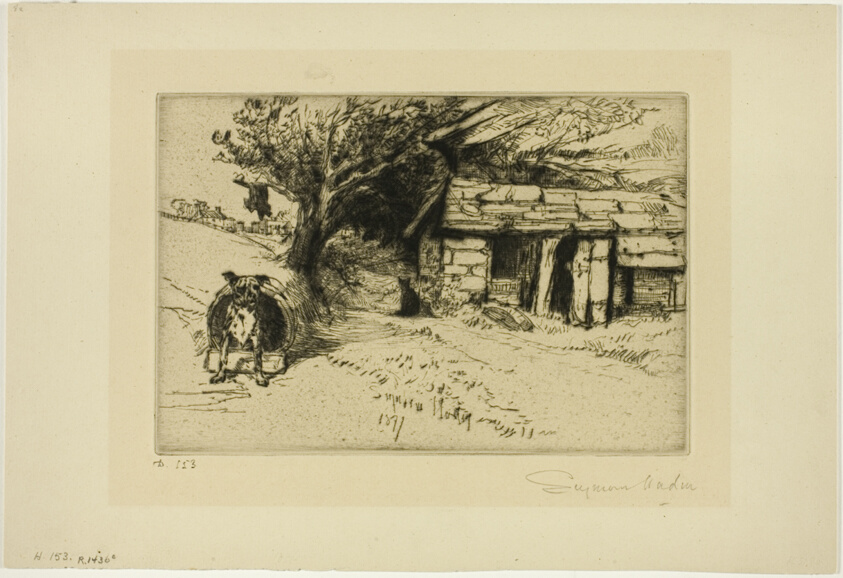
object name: Print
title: The Cabin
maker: Francis Seymour Haden (English, 1818-1910)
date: 1877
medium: Drypoint on cream wove paper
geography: England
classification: etching; print; prints and drawing